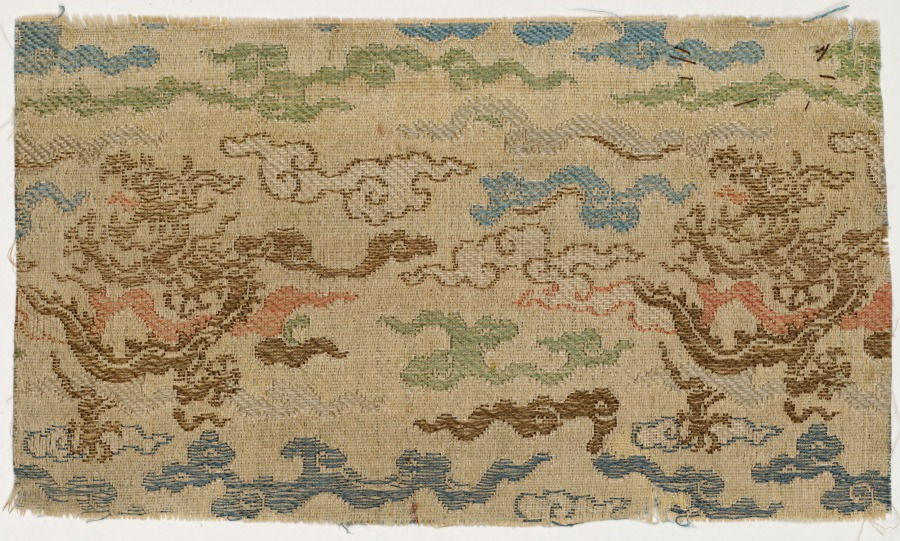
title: Fragment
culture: China, 18th century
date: 1700s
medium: satin ground; silk diasper weave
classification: Textile